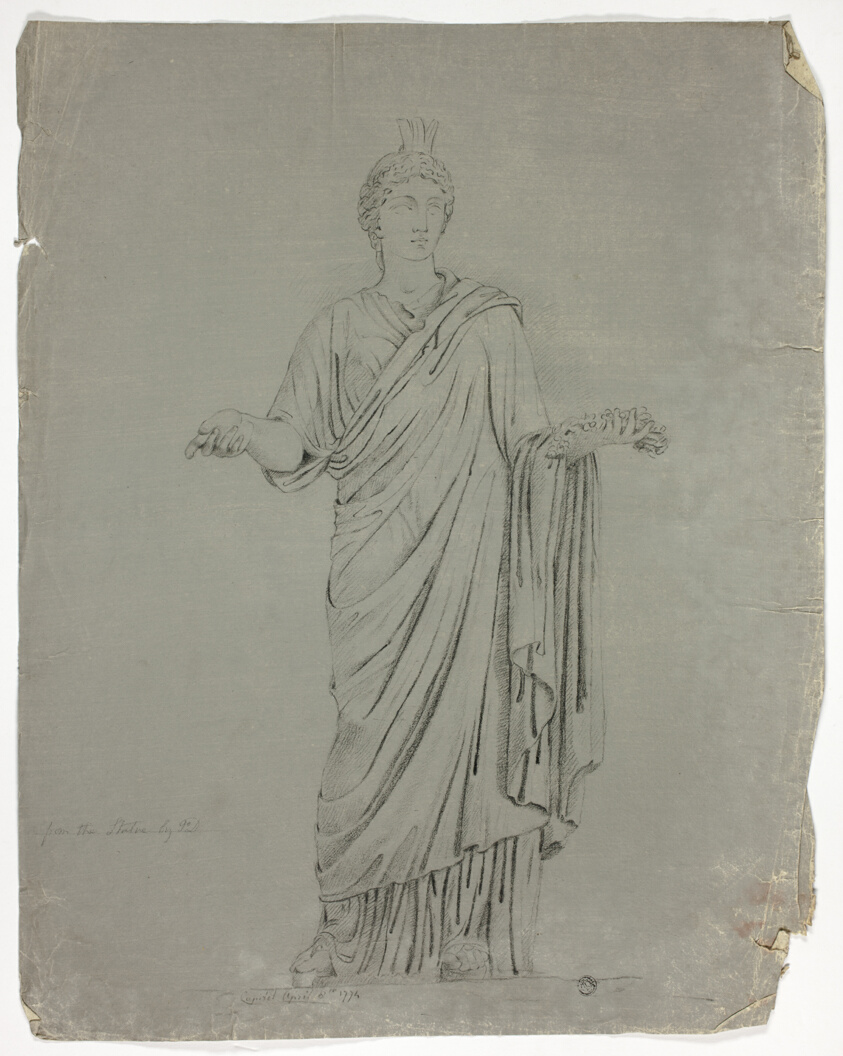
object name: Drawing and Watercolor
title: Antique Statue of Standing Goddess with Outstretched Arms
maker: John Downman (English, 1750-1824)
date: 1774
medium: Black crayon on ivory laid paper prepared with a gray ground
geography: England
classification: charcoal; drawings (visual works); prints and drawing